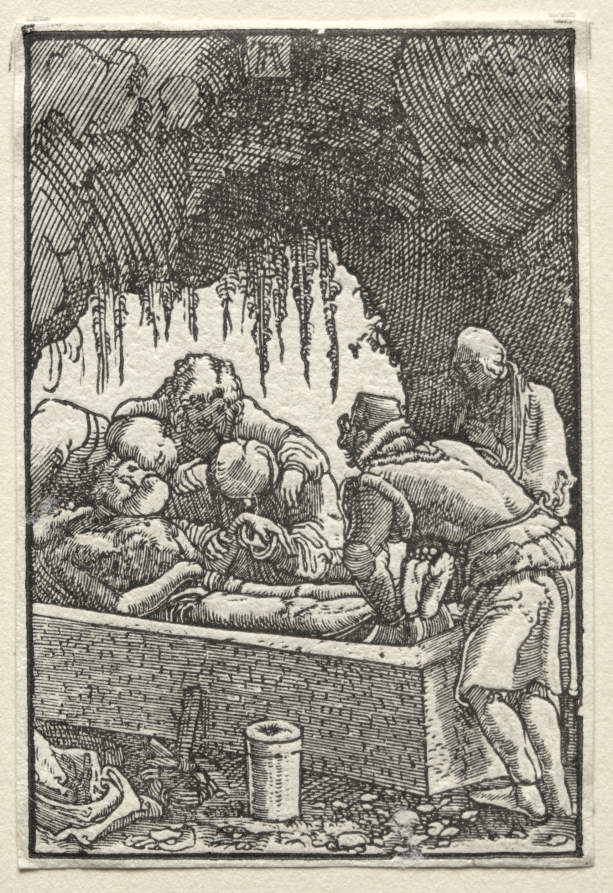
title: The Fall and Redemption of Man: Burial of Christ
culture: Germany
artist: Albrecht Altdorfer (German, c. 1480–1538)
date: c. 1515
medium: woodcut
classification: Print